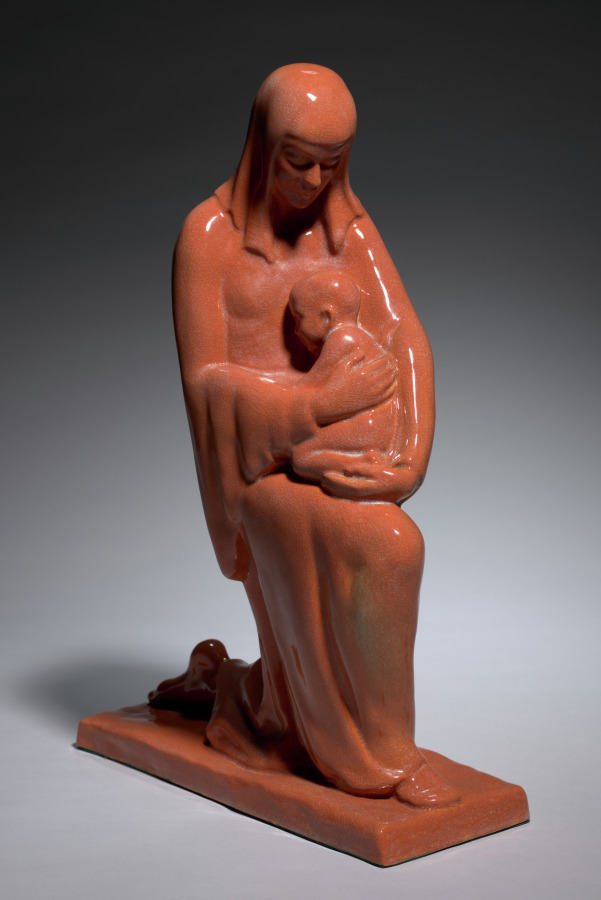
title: Madonna and Child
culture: America, Ohio, Cleveland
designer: R. Guy Cowan (American, 1884–1957)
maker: Cowan Pottery Studio (America, Ohio, Lakewood, 1913–1919)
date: c. 1928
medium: pottery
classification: Ceramic